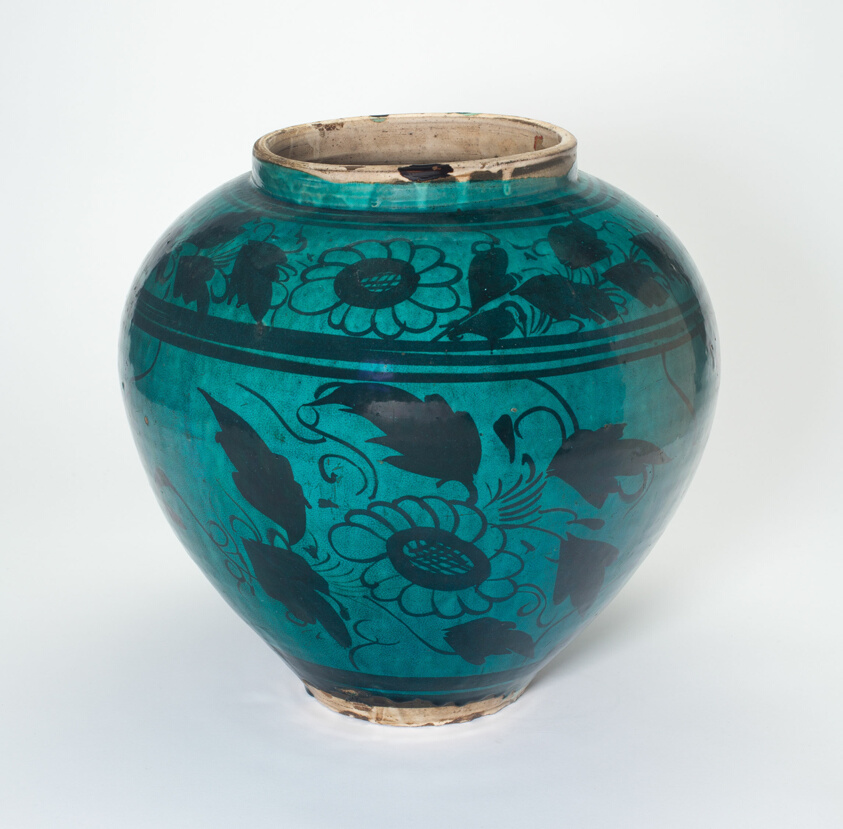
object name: Vessel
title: Vase with Stylized Flowers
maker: China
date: Jin dynasty, c. 13th century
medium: Cizhou ware; stoneware with aqua blue and black glazes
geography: China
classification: stoneware; asian art; ceramics; vessel